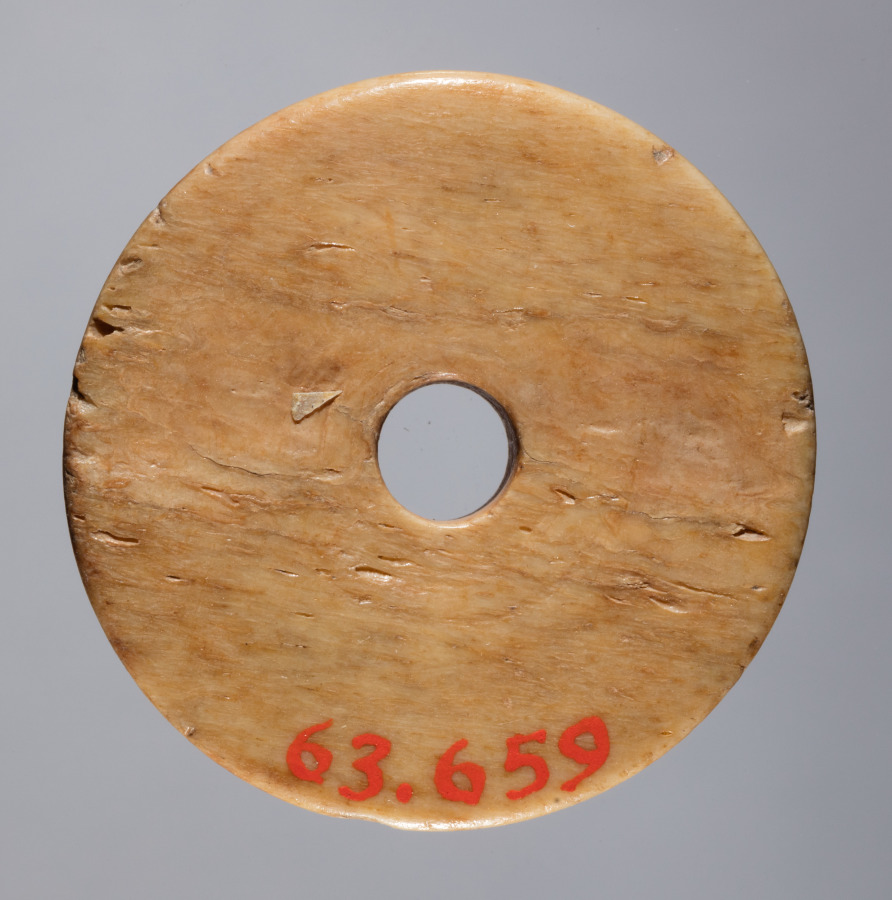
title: Spindle Whorl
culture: Iran, early Islamic period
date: 700s - 900s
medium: bone, incised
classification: Spindle Whorl